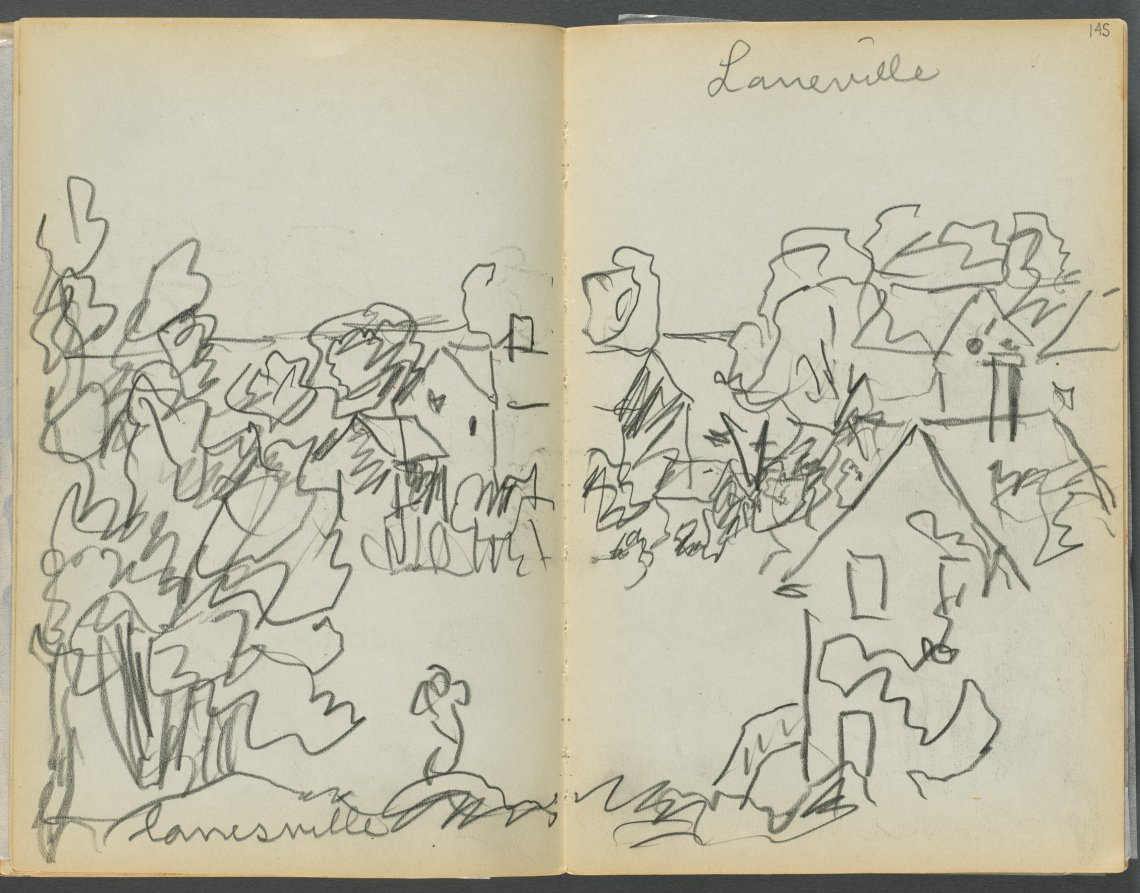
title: Sketchbook- The Granite Shore Hotel, Rockport, page 144 & 145: "Lanesville"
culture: America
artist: Maurice Prendergast (American, born Newfoundland [now Canada], 1858–1924)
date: 1905–10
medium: graphite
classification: Bound Volume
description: This sketchbook contains 72 pages of pencil drawings and 9 watercolors of Cape Ann. On the inside of the cover Prendergast wrote the address of the Granite Shore Hotel in Rockport, Massachusetts.